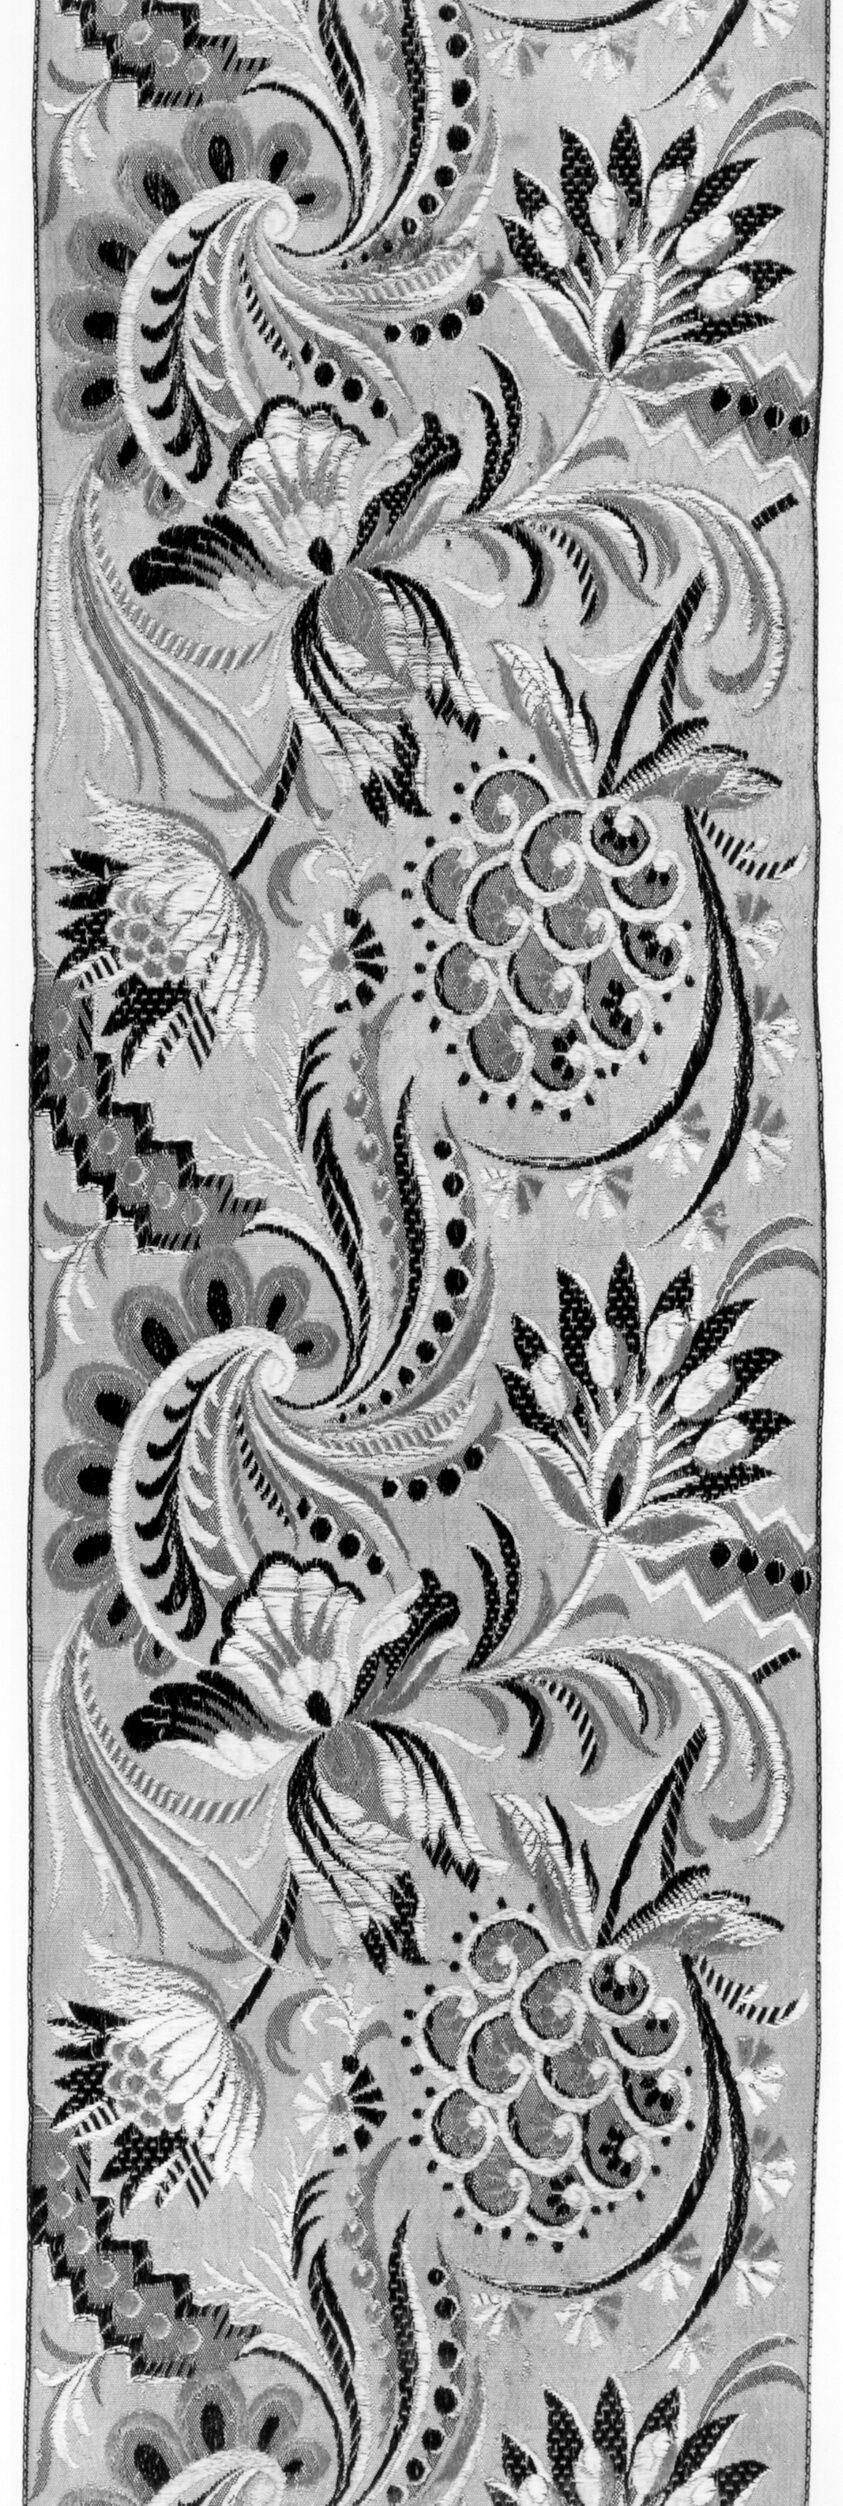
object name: Textile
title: Ribbon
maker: Probably France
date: c. 1870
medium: Silk, double-faced two-color complementary warp and weft plain weave self-patterned by main warp and ground weft floats; woven on a loom with Jacquard attachment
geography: France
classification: textile; weaving